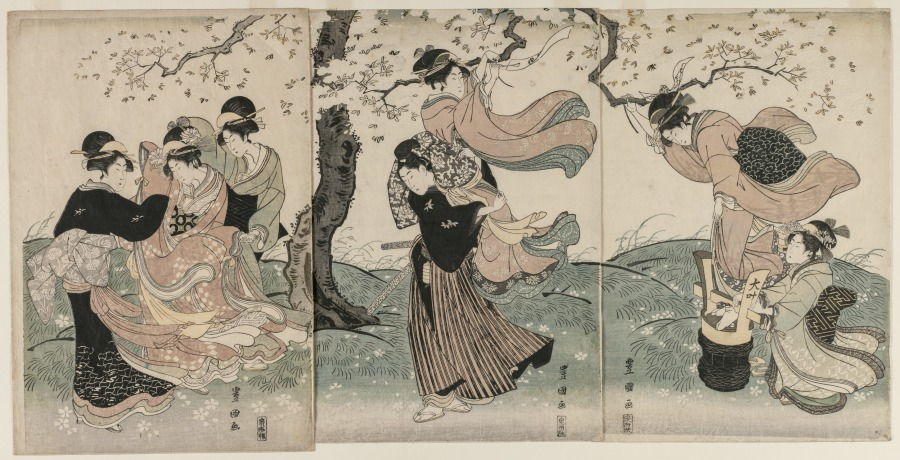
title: Cherry Blossoms in the Wind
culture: Japan, Edo period (1615–1868)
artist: Utagawa Toyokuni (Japanese, 1769–1825)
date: late 1790s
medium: Triptych of woodblock prints, ink and color on paper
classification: Print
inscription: Signature: Toyokuni ga Publisher: Izumiya Ichibei (Senichi han)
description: Highly regarded for his images of actors, Toyokuni was also known for his prints of beauties that demonstrate his brilliant skill in composition. This triptych depicts a joyful hanami (flower viewing) scene in spring. One woman stands on a huge wine bottle, while another one sits on a samurai’s shoulder; in both scenes, the women are tying prayers or poems on tree branches. On the left, two servants protect a well-dressed lady from the wind. Their fluttering, long-sleeved kimonos capture the wind’s movement. Standing in a triad, the three groups form a stable, harmonic composition against the cherry blossom background.